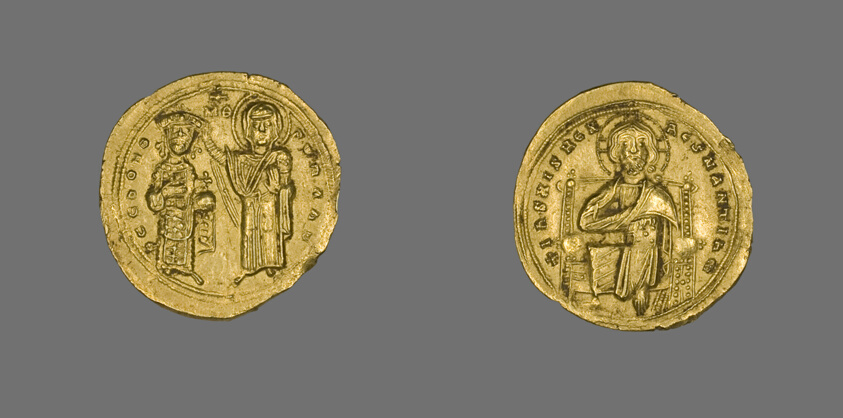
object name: Coin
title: Histamenon (Coin) of Romanus III Argyrus with Christ Enthroned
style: byzantine, european, ancient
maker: Byzantine; minted in Constantinople (now Istanbul)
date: 1028-34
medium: Gold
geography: Istanbul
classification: coin; ancient art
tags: goddesses, gods (deities)